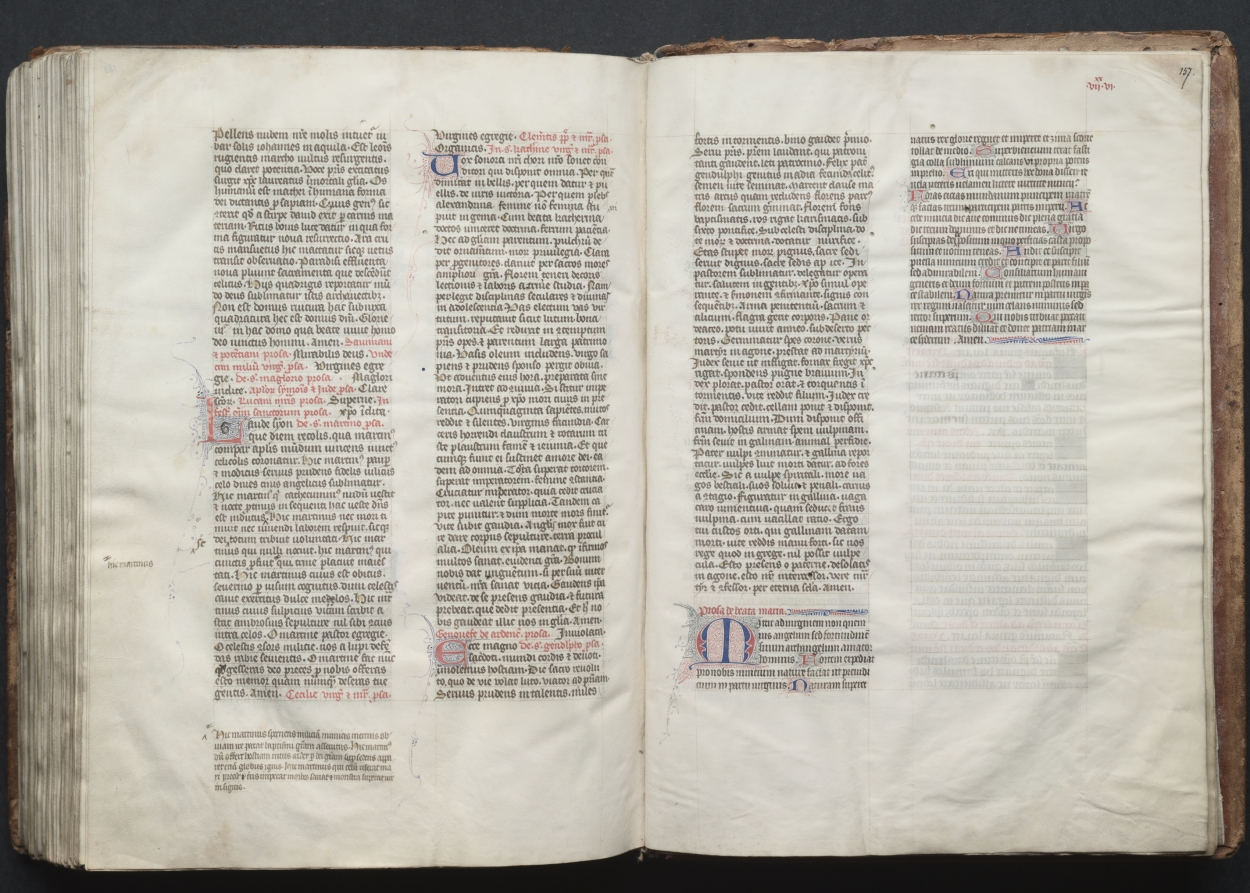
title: The Gotha Missal: Fol. 156v, Text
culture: France, Paris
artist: Master of the Boqueteaux (French)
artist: and Workshop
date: c. 1375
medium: ink, tempera, and gold on vellum; blind-tooled leather binding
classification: Bound Volume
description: The style and quality of this manuscript's decoration is typical of deluxe Parisian books made for aristocratic or royal patrons. Most of the book's decoration appears to be the work of the Master of the Boqueteaux, an artist active at the court of King Charles V (died 1380). His style was apparently shared by a number of book illuminators working in and around Paris. It is very possible that the Gotha Missal belonged to Charles V, but is not provable because the manuscript has no royal portraits and lacks a colophon. Given the book's magnificent decoration, however, it would seem that it was produced for a Valois prince, if not for the king himself. The manuscript receives its name from the German dukes of Gotha, its later owners.